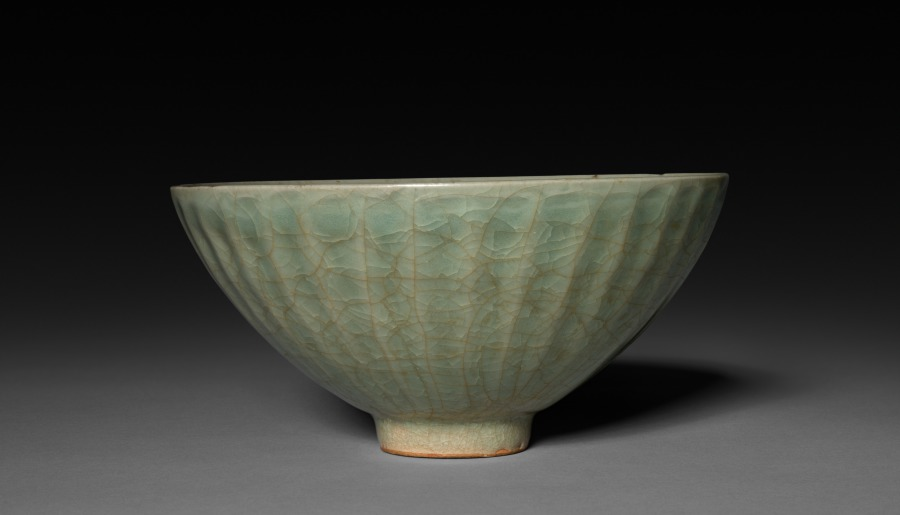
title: Bowl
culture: China, Southern Song dynasty (1127-1279)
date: 1200s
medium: glazed buff stoneware, Southern Celadon ware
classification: Ceramic